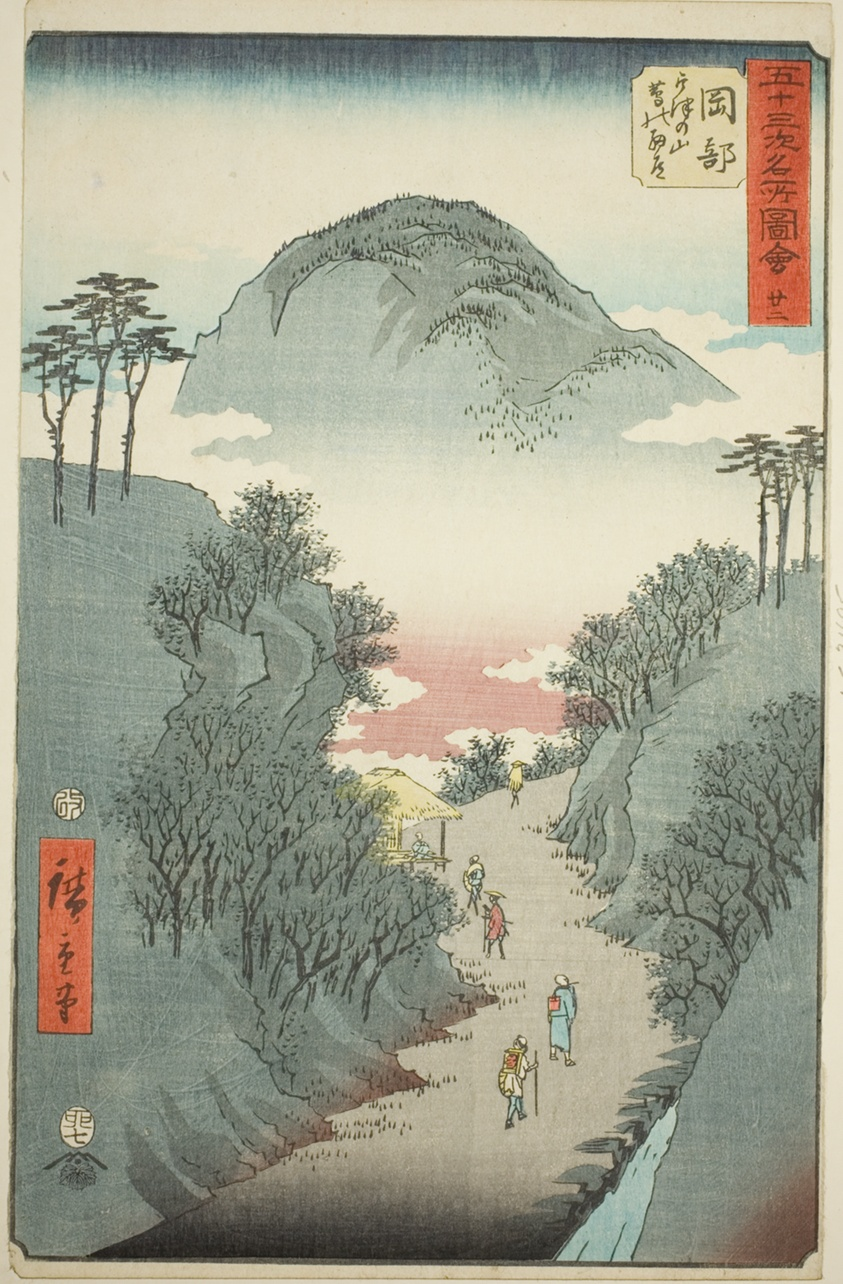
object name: Print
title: Okabe: Narrow Ivy-covered Road at Mount Utsu (Okabe, Utsu no yama tsuta no hosomichi), no. 22 from the series "Famous Sights of the Fifty-three Stations (Gojusan tsugi meisho zue)," also known as the Vertical Tokaido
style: Japanese (culture or style)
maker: Utagawa Hiroshige 歌川 広重; Japanese, 1797-1858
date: 1855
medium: Color woodblock print; oban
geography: Japan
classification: woodblock print; print; asian art